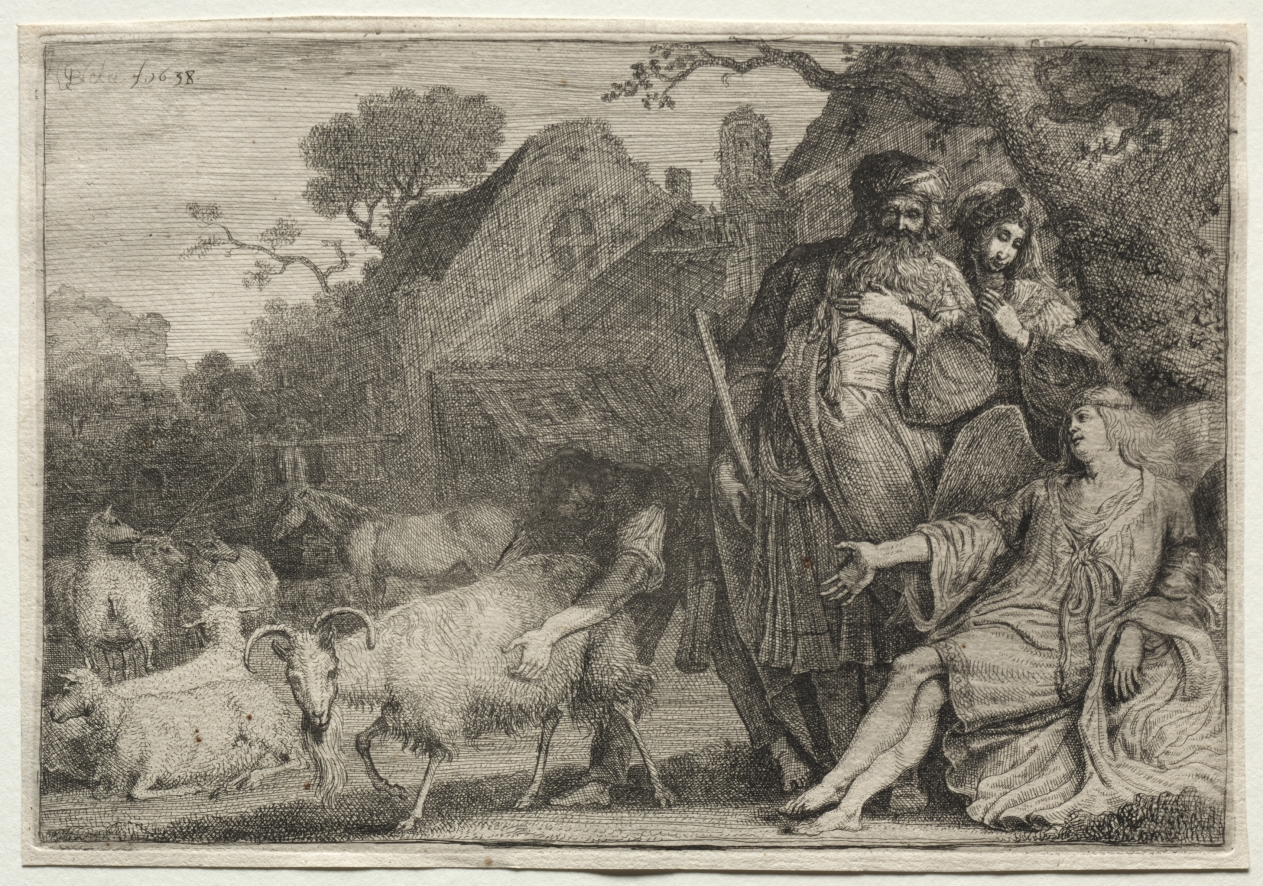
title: An Angel Foretells the Birth of Abraham's Son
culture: Netherlands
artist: Gerrit Claesz. Bleker (Dutch, 1656)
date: 1638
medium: etching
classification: Print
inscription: upper left, in plate: GBleker f.1638. ; VERSO, lower left, in graphite: 1125 ; lower left, in graphite: [f M.ar ?] (underlined) / [f vr ?] ; lower left, in graphite: B.293 ; lower center, in graphite: Bleker B.1; lower right, in graphite: EW